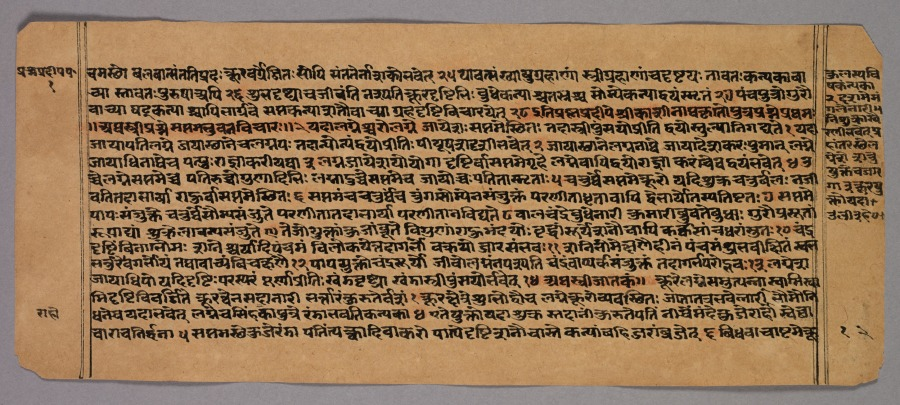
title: Page from the Prasnapradipa, a Hindu Astrology Text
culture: Western India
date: c. 1700s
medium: ink on paper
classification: Manuscript